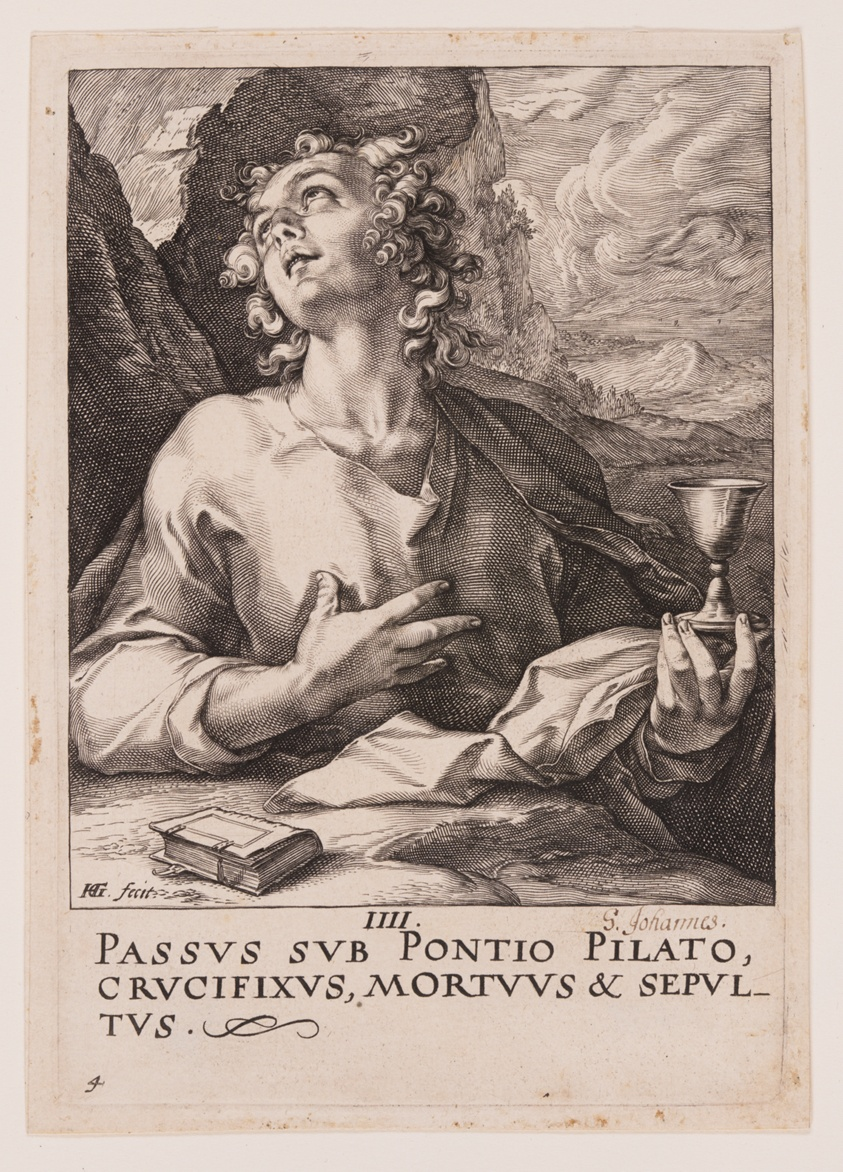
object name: Print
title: St John, from Christ, the Apostles and St Paul with the Creed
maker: Hendrick Goltzius (Dutch, 1558–1617)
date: 1589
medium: Engraving on ivory laid paper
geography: Netherlands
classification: engraving; paper; print; prints and drawing